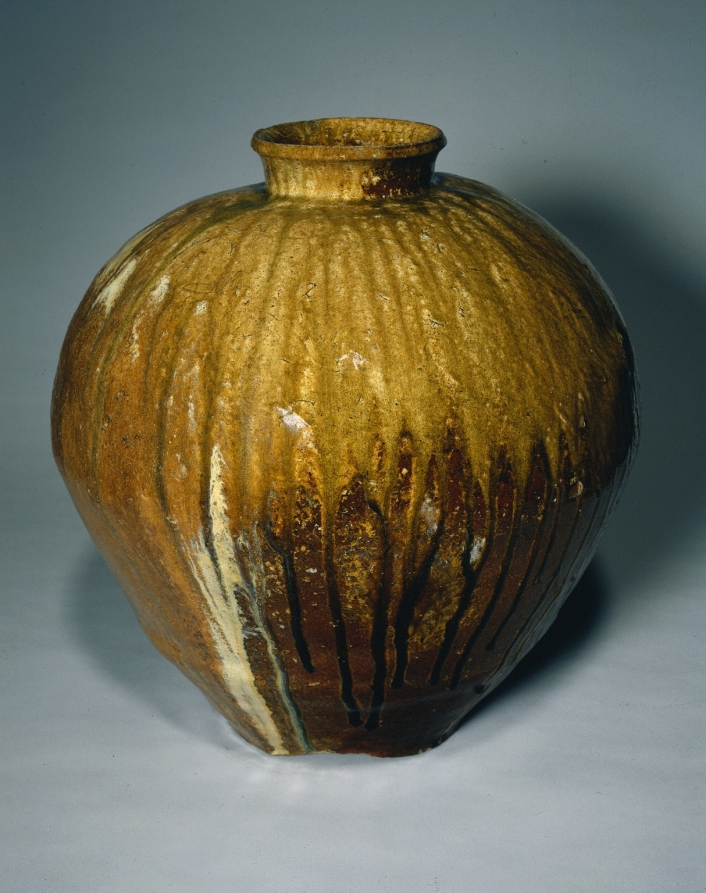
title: Storage Jar, Echizen Ware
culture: Japan, Muromachi period (1392–1573)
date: 1400s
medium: stoneware with natural ash glaze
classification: Ceramic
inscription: Incised artisan's mark